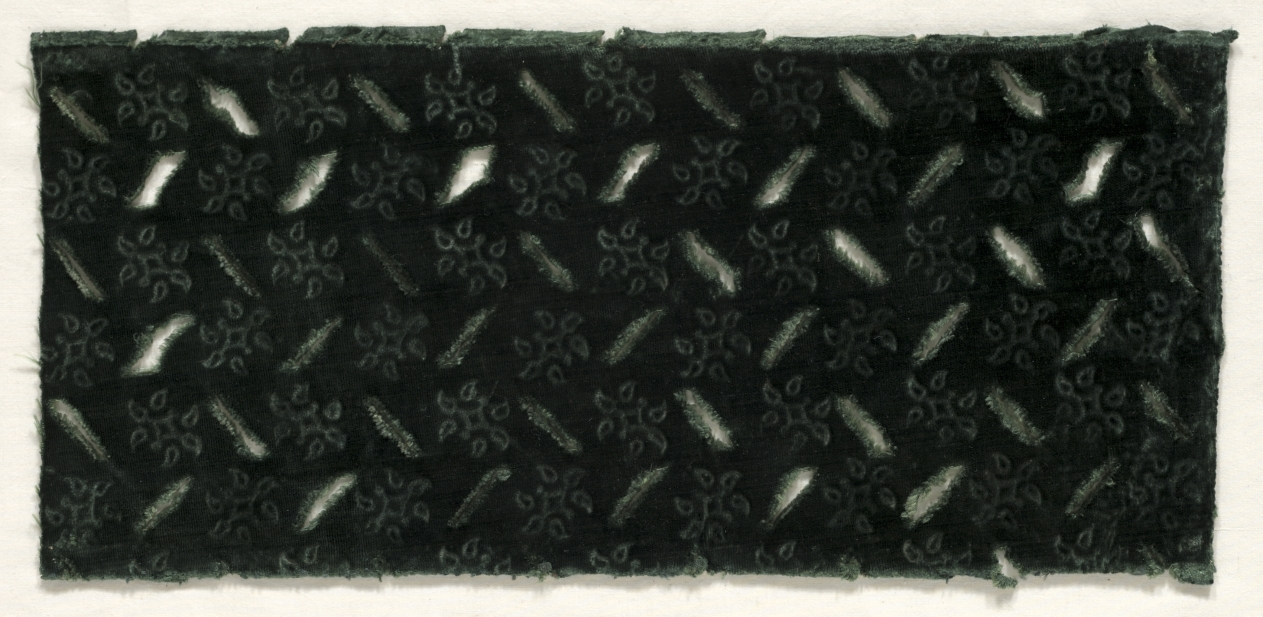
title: Stamped Velvet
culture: Spain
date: 1600s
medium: velvet (cut and stamped): silk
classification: Velvet